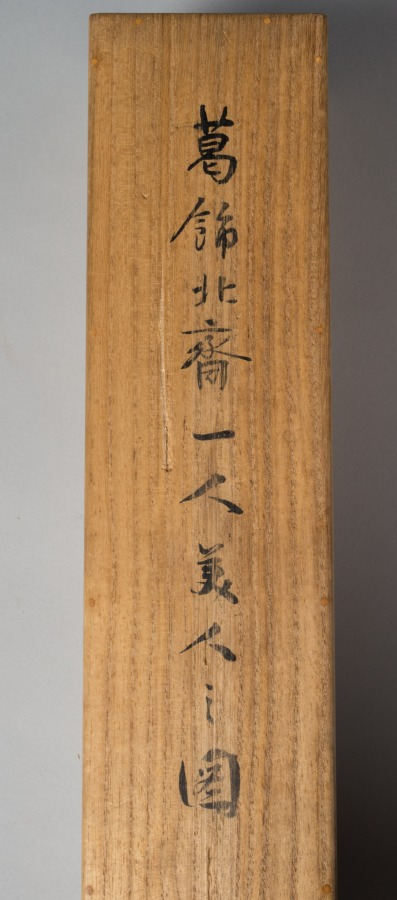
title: Beauty (Bijin)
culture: Japan, Edo period (1615–1868)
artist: Katsushika Hokusai (Japanese, 1760–1849)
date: c. 1775–1849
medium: hanging scroll; ink and color on paper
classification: Painting